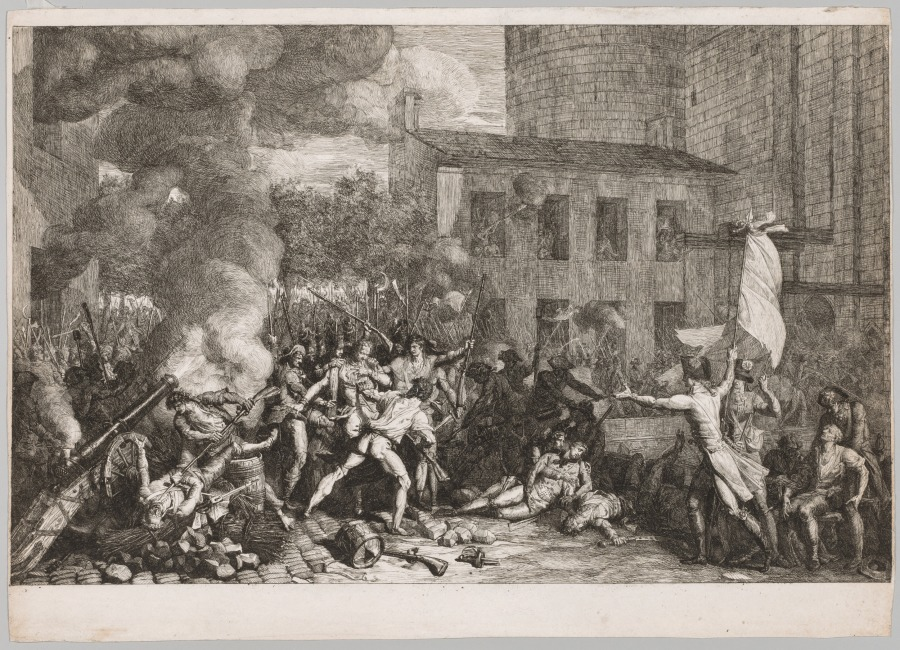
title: The Storming of the Bastille, July 14, 1789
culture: France, 18th century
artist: Charles Thévenin (French, 1764–1838)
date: 1790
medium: Etching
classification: Print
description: Overtaking the Bastille, a fortress prison and symbol of the monarchy’s power, was a turning point in the French Revolution (1789–99). This etching of the successful rebellion is the only print made by the history painter Charles Thévenin. Typically, artists recorded historical events in paintings that printmakers then engraved with tools called burins, but in this case Thévenin drew his composition directly on the prepared etching plate, capturing a sense of the excitement he claimed to have witnessed firsthand. A newspaper announcement for the etching marveled at its capacity to expediently relate the emotional spirit of the revolutionary event, for which viewers would otherwise have to “await vainly from the cold burin.”